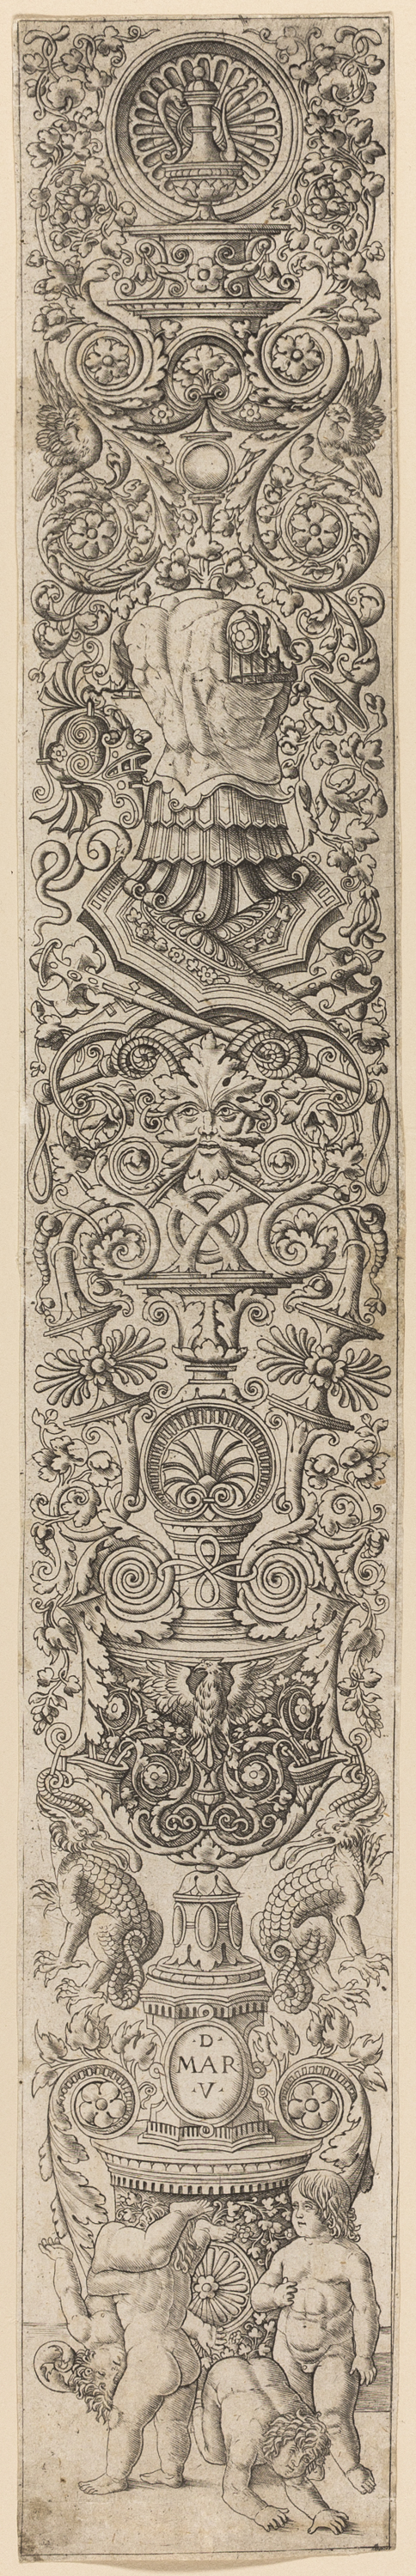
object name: Print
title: Four Children Playing, plate seven of Twelve Ornament Panels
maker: Giovanni Antonio da Brescia (Italian, c. 1460-1523)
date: c. 1505–15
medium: Engraving in black on grayish ivory laid paper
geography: Italy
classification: engraving; print; prints and drawing